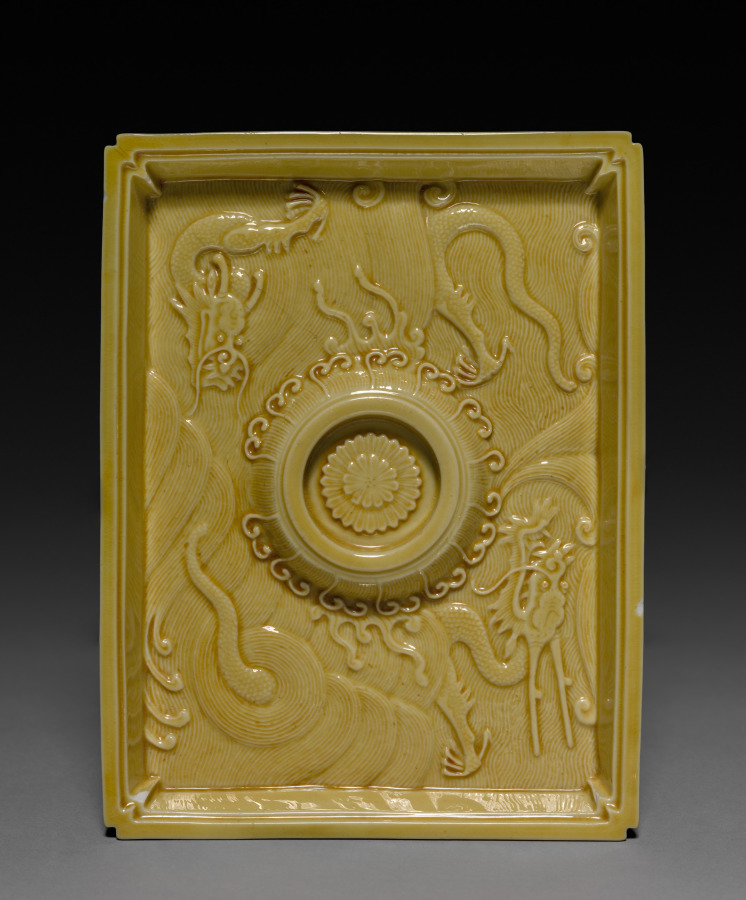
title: Cup Stand with Dragons in Waves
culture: China, Jiangxi province, Jingdezhen kilns, Qing dynasty (1644-1911), Kangxi reign (1662-1722)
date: 1662–1722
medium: porcelain with molded decoration and yellow glaze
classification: Ceramic